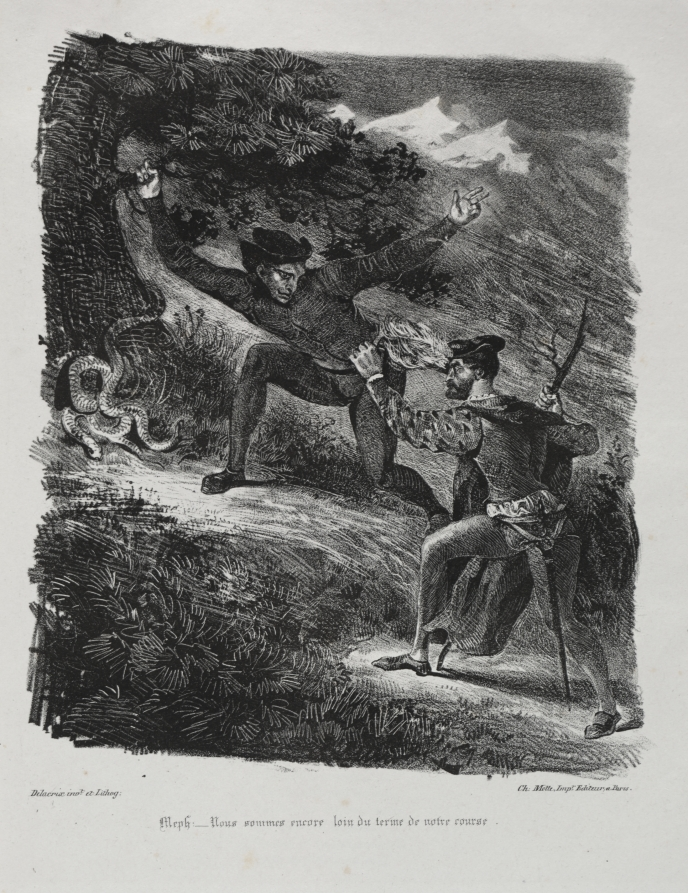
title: Illustrations for Faust: Faust and Méphistophélés in the mountains of the Hartz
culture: France, 19th century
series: Faust: Tragédie de M. de Goethe, translated into French by Albert Stapfer.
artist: Eugène Delacroix (French, 1798–1863)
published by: Chez Ch. Motte, Éditeur, distributed by Chez Sautelet, Libraire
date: 1828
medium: lithograph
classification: Print